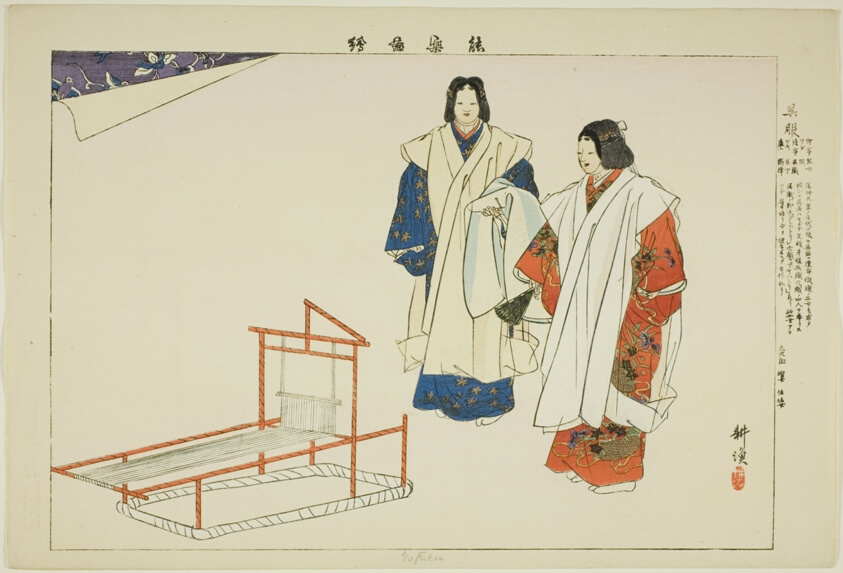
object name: Print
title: Yofuku, from the series "Pictures of No Performances (Nogaku Zue)"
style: Japanese (culture or style)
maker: Tsukioka Kogyo; Japanese, 1869-1927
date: 1898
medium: Color woodblock print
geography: Japan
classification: woodblock print; print; asian art